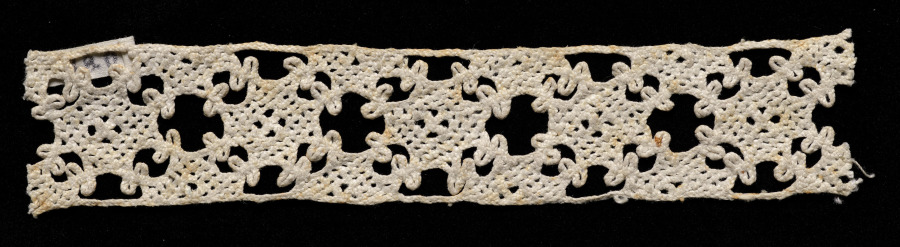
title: Lace Insertion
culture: Italy, Venice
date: 1580–99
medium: Bobbin lace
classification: Lace